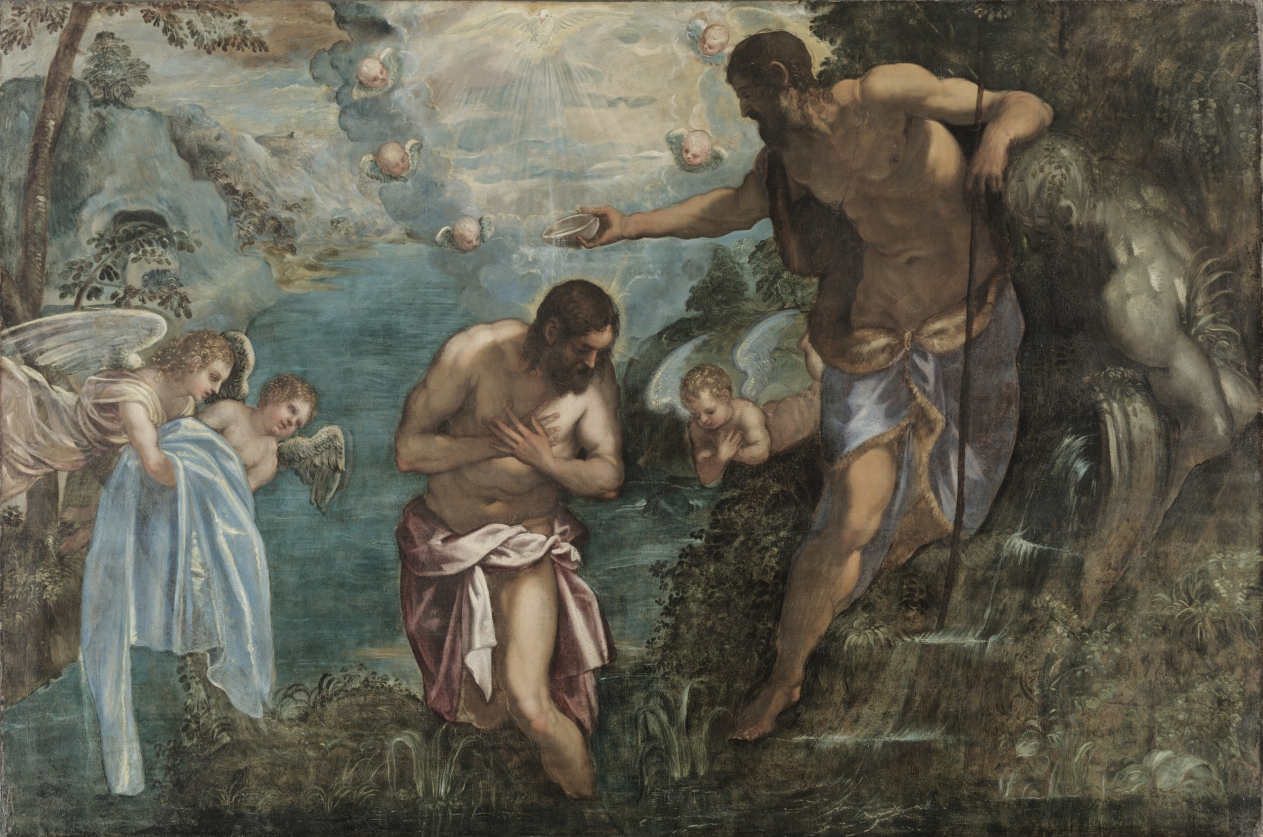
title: Baptism of Christ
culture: Italy, 16th century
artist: workshop of Jacopo Tintoretto (Italian, 1518–1594)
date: 1580s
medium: oil on canvas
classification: Painting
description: Based on a passage from the New Testament book of Matthew, this work depicts Saint John the Baptist performing Christ's baptism in the river Jordan, during which the heavens opened and the Holy Spirit descended in the form of a dove. The powerful modeling of the bodies and luminous color characterize High Renaissance painting in Venice. Because of Tintoretto's pioneering use of rich color, his work was a crucial source for many later artists.